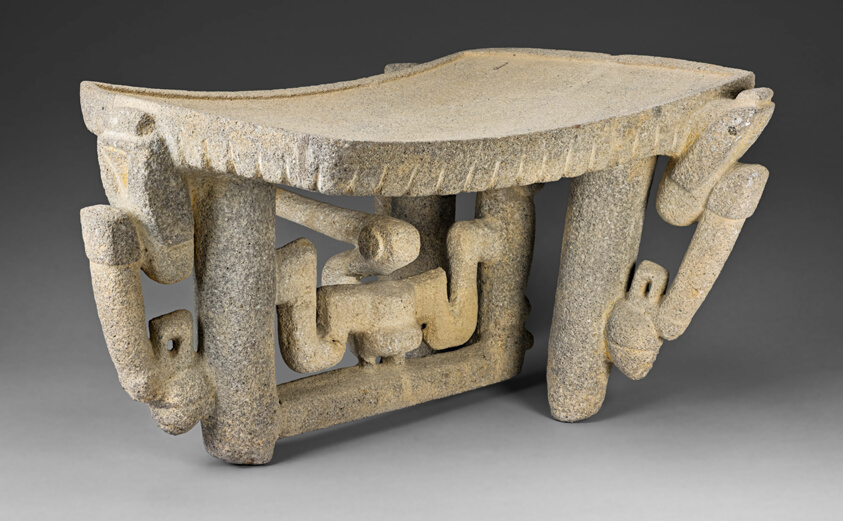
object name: Sculpture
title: Ceremonial Grinding Table (Metate)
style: nicoya, americas, lower central america, Arts of the Americas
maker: Nicoya (Nicoya, Guanacaste province, Costa Rica)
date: 1–500 CE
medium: Volcanic stone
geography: Nicoya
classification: stone; art of the americas; ceremonial object; metate; sculpture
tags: birds, animals, sacrifice